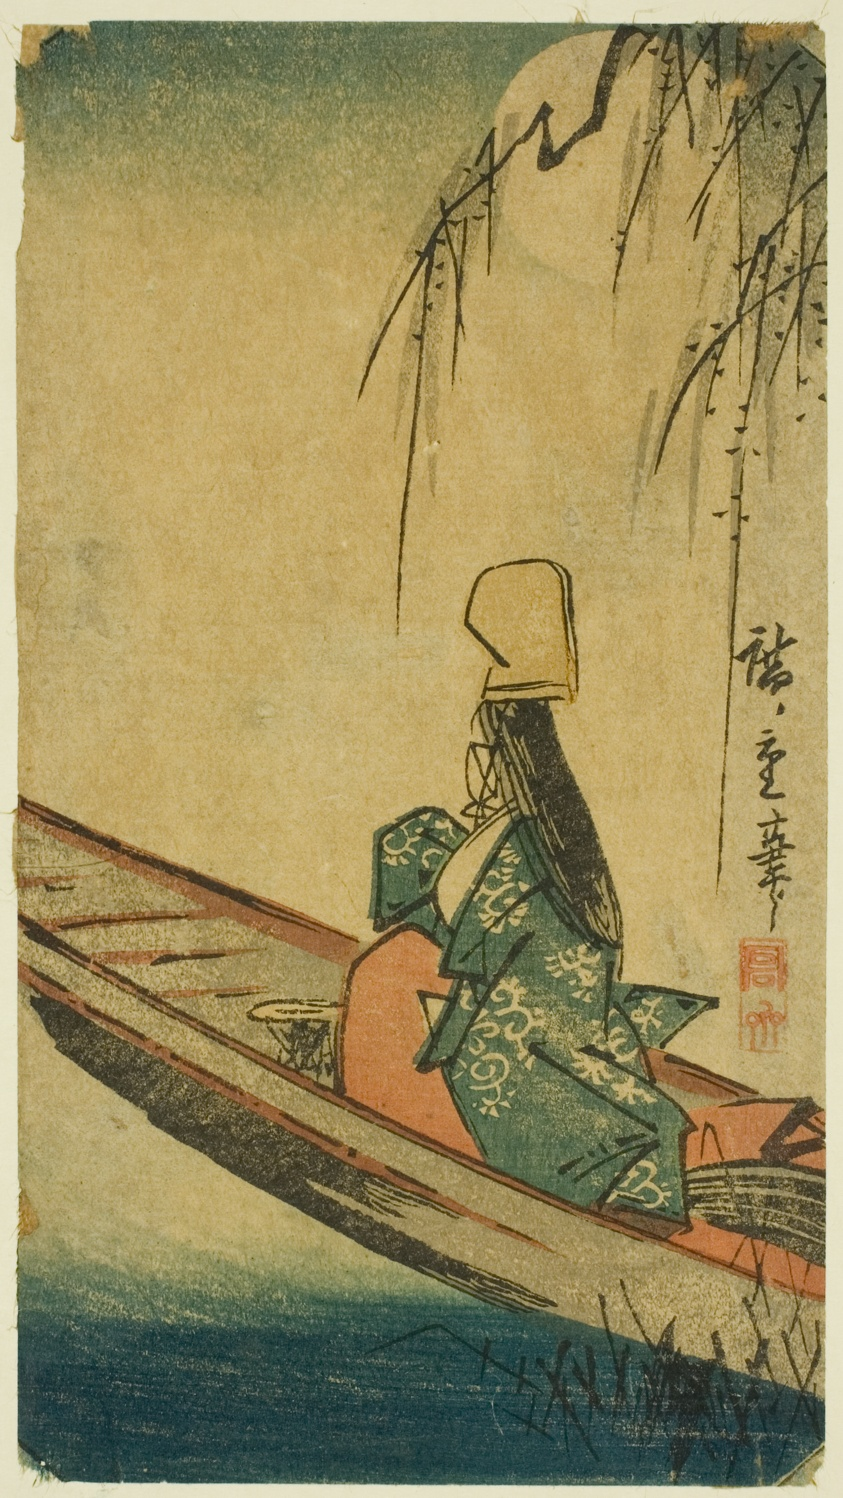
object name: Print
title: Asazuma boat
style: Japanese (culture or style)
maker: Utagawa Hiroshige 歌川 広重; Japanese, 1797-1858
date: c. 1840s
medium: Color woodblock print; section of harimaze sheet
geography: Japan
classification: woodblock print; print; asian art